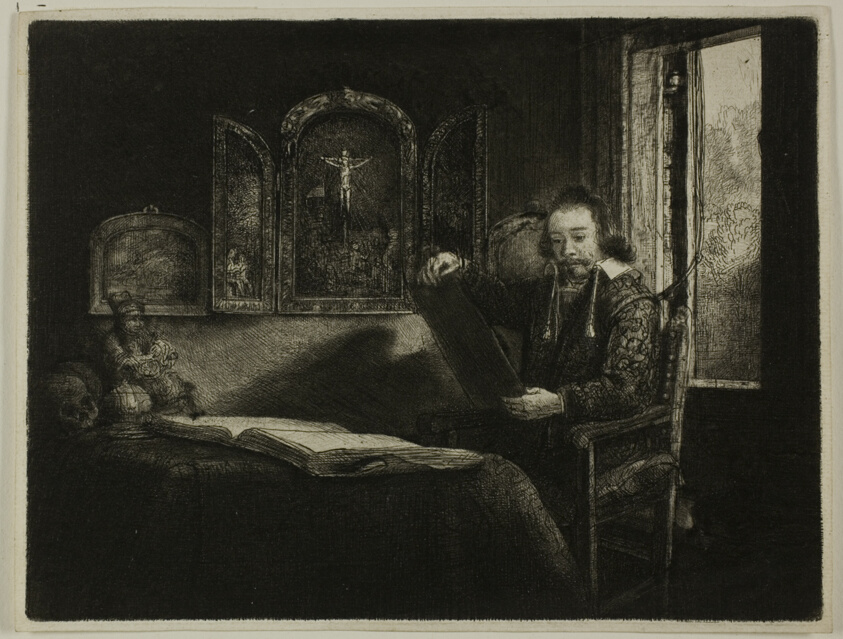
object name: Print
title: Abraham Francen, Apothecary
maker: Rembrandt van Rijn (Dutch, 1606-1669)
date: c. 1657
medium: Etching and drypoint in black on paper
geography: Holland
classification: etching; print; prints and drawing; paper; drypoint